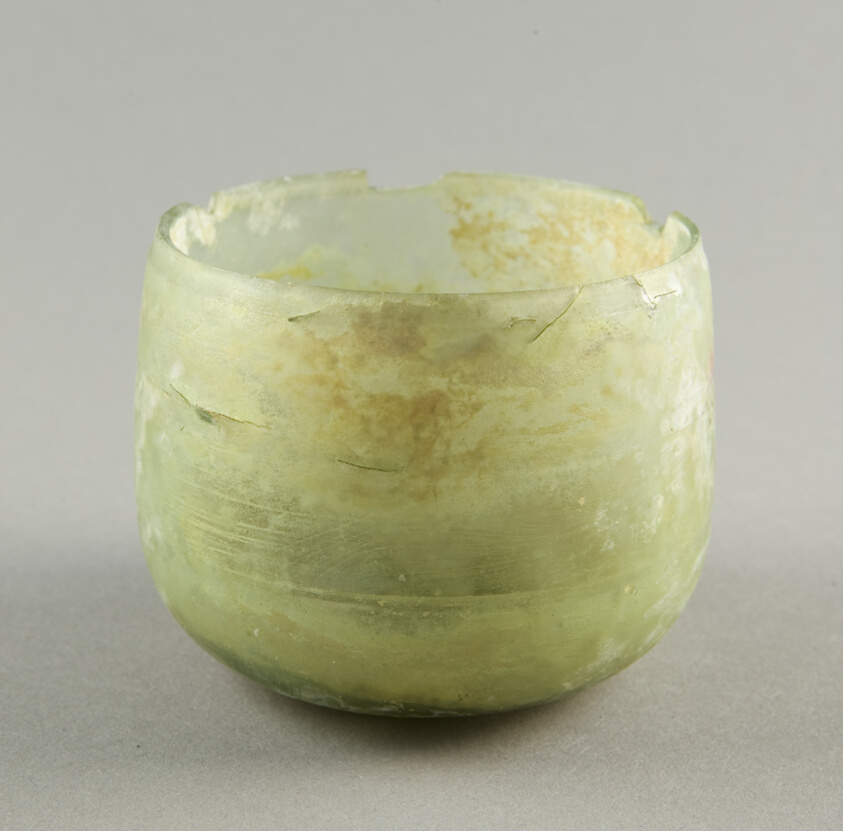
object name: Vessel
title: Bowl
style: syrian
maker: Roman, Levant or Syria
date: 1st-3rd century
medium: Glass, blown technique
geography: Syria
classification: bowl; glass; vessel; ancient art